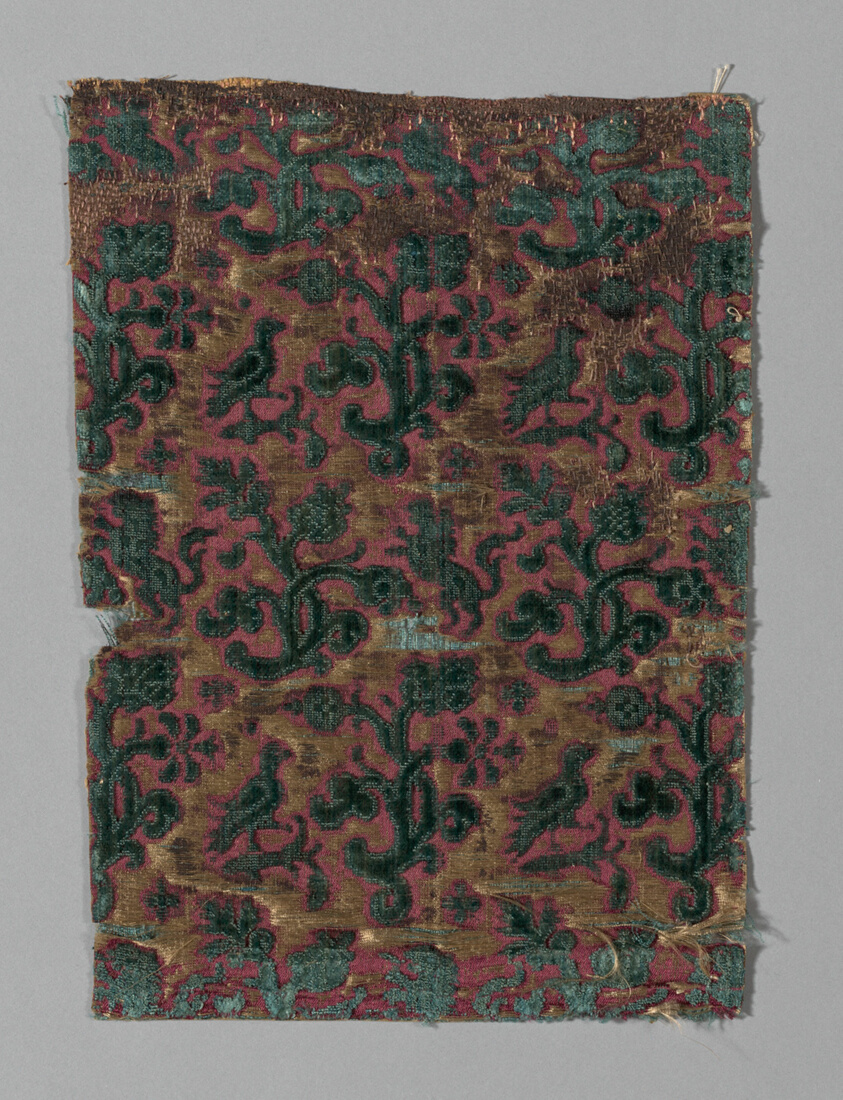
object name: Textile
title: Fragment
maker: Italy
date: First half of the 17th century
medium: cisele voided stain velvet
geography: Italy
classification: textile; weaving - velvet; weaving